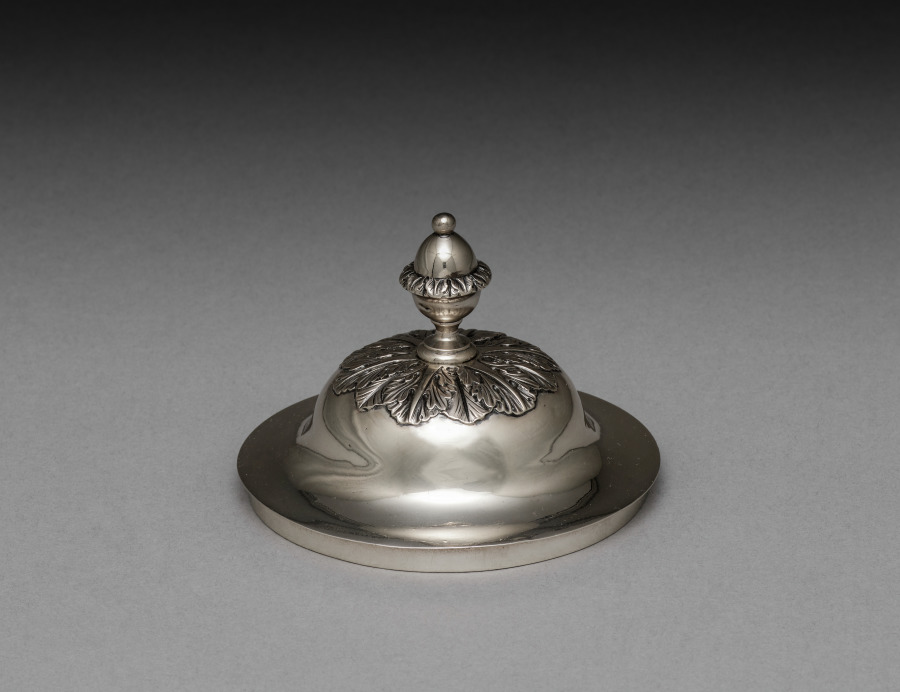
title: Sugar Urn with Cover (lid)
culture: America, Pennsylvania, Philadelphia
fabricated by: Harvey Lewis (American, 1835)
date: c. 1811–25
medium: silver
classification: Silver